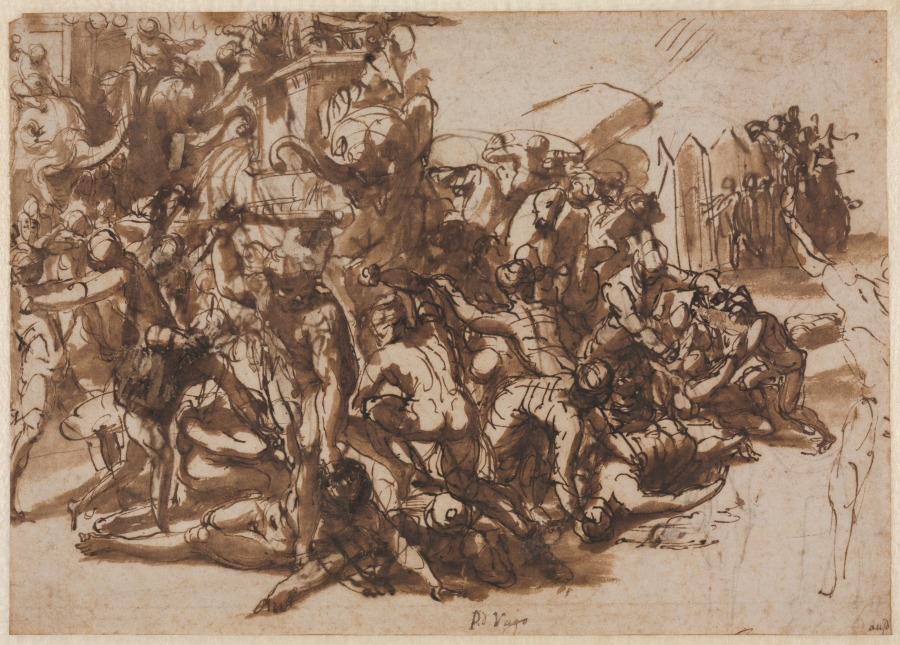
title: Poros Assailed by the Macedonian Army (recto); Sketches of Animals (verso)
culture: Italy, 16th century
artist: Perino del Vaga (Italian, 1501–1547)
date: c. 1545/47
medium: pen and brown ink (iron gall) and brush and brown wash; framing lines in gold paint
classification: Drawing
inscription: recto: lower center, in brown ink: P.d Vago ; lower right, in brown ink: aud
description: Perino del Vaga made this spirited pen and ink and wash drawing as a preliminary sketch for a fresco cycle depicting the military campaigns of Alexander the Great, intended for the apartments of Pope Paul III in the Castel Sant’Angelo in Rome. At the time, he was also working on commissions at the Vatican Palace where he studied and drew from the frescoes of Michelangelo in the Sistine Chapel. One pose in the drawing, that of the man in front who, sword poised over his head, prepares to strike a man below, was probably inspired by Michelangelo’s rendering of David and Goliath on the ceiling. Perino adapted the violent pose for a military rather than biblical subject, filling out the scene with trumpeting elephants and a pile of soldiers in combat. On the verso of the sheet, Perino drew a quick sketch of a standing camel and another, closer view of the animal's head and legs.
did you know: This artist was in Rome in 1527 when the troops of Charles V sacked the city, and was imprisoned and forced to pay a heavy ransom for his, his wife's, and his daughter's safe release.